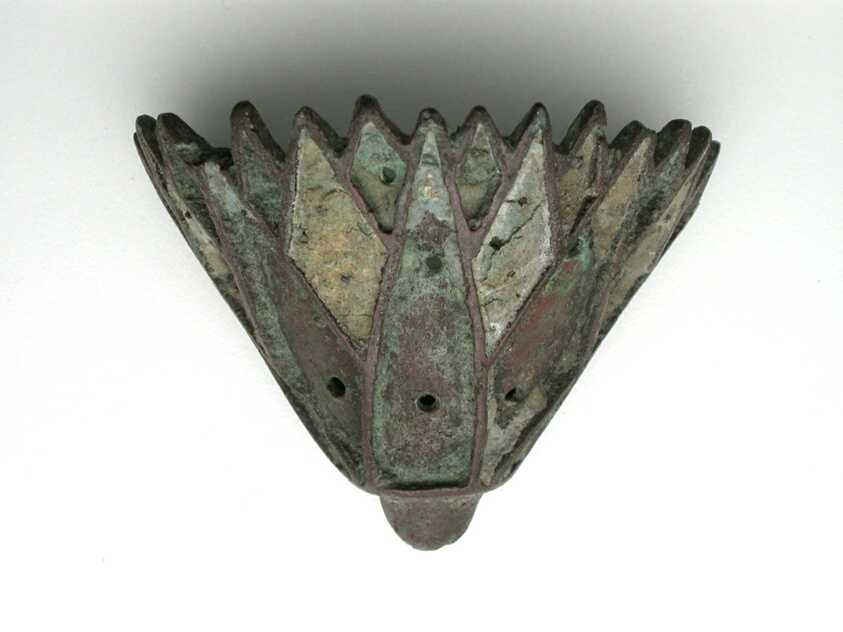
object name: Sculpture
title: Lotus Flower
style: third intermediate period, egyptian, ancient, twenty-fifth dynasty, twenty-first dynasty, twenty-fourth dynasty, twenty-second dynasty, twenty-third dynasty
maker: Egyptian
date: Third Intermediate Period, Dynasty 21–25 (about 1069–664 BCE)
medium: Bronze, inlay (?)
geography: Egypt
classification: sculpture; bronze; metal; inlay; ancient art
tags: lotus, flowers